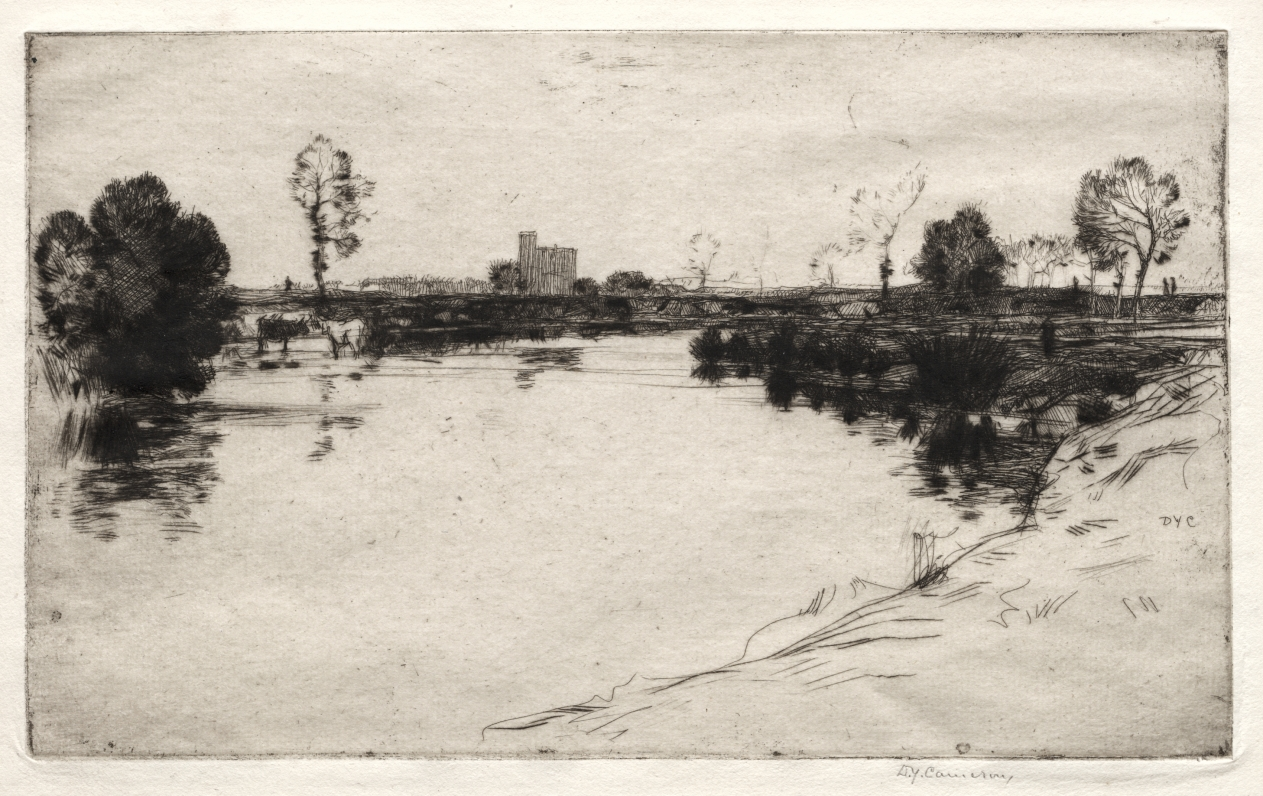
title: Cambuskenneth, Stirlingshire, Scotland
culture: England, early 20th Century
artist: David Young Cameron (British, 1865–1945)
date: 1904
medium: etching and drypoint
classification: Print